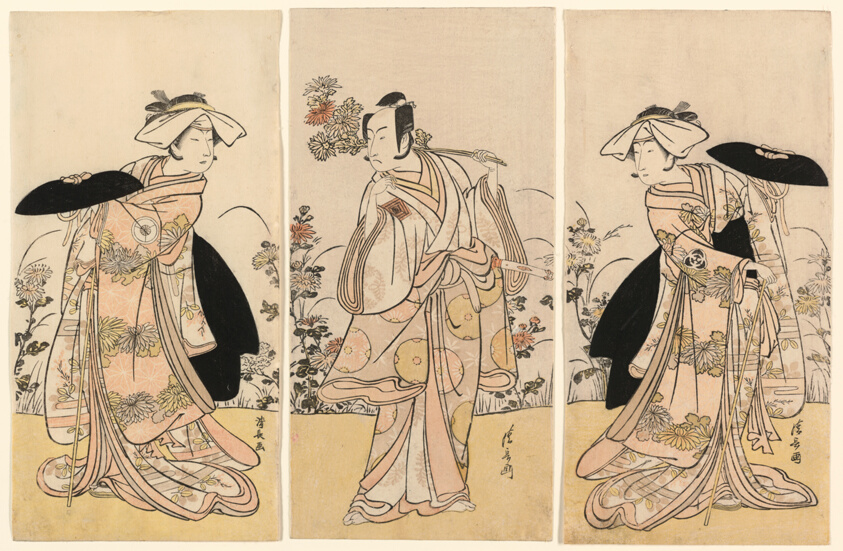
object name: Print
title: Bando Mitsugoro II as Tennen no Mansaku-kitsune and Ichikawa Monnosuke III as Nikaido Shinanonosuke and Iwai Hanshiro IV as Okura no Kojoro-kitsune in the scene from the drama Moto Mishi Yuki Sakae Hachi-no-ki (Nidaime Bando Mitsugoro no Tennen no mansaku-kitsune, nidaime Ichikawa Monnosuke no Nikaido Shinanonosuke, yondaime Iwai Hanshiro no Okura no kojyoro-kitsune)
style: Japanese (culture or style)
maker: Torii Kiyonaga (Japanese, 1752-1815)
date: 1778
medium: Color woodblock print; hosoban, nishiki-e, triptych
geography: Japan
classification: woodblock print; print; asian art